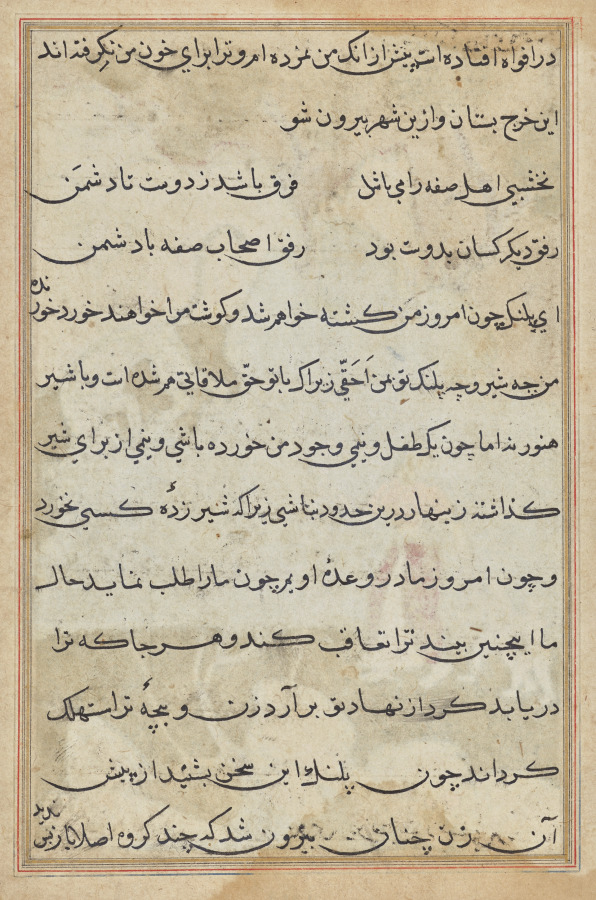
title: Page from Tales of a Parrot (Tuti-nama): text page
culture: Mughal India, court of Akbar (reigned 1556–1605)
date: c. 1560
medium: gum tempera, ink, and gold on paper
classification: Painting